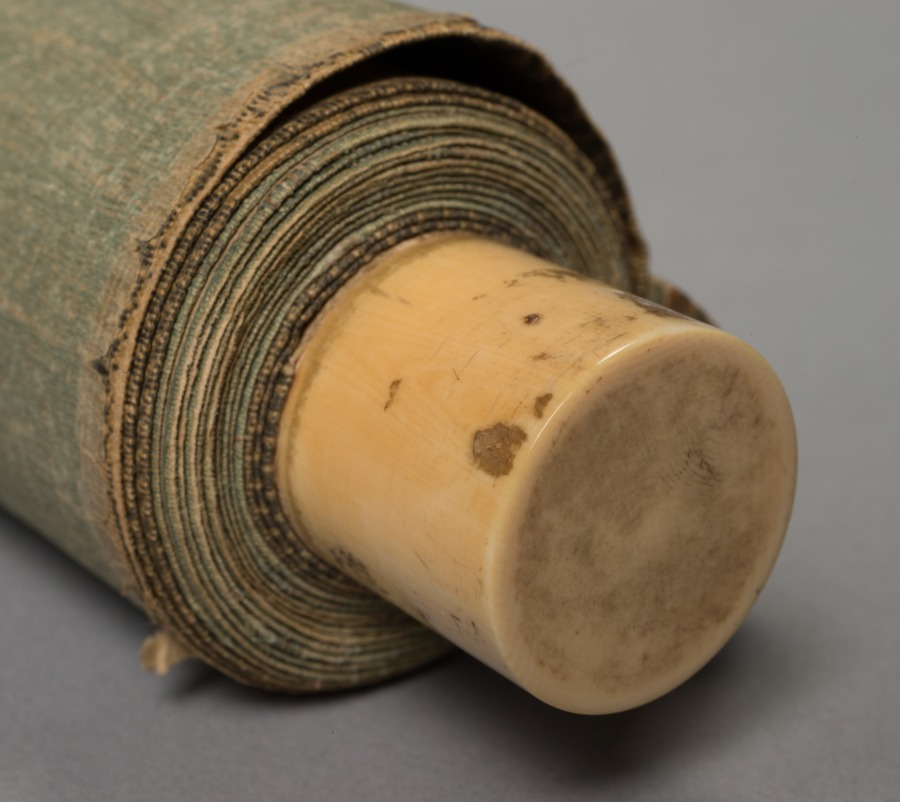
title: Bamboo in Wind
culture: Japan, Muromachi period (1392–1573)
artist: attributed to Genga (Japanese)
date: early 1500s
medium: hanging scroll; ink on silk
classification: Painting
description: East Asian paintings from China, Korea, and Japan were frequently conceived as sets of multiple images. These sets might have been composed for specific palace or temple rooms, or to portray a specific theme, such as the four seasons. Over time, the original intent of such sets is often lost through damage, changes in ownership, or a variety of other reasons. The identity of the artist can also be lost, but then, sometimes, retrieved. This pair of ink paintings has traditionally been labeled as Japanese and attributed to the 16th-century painter Genga. Since there are no seals or signature of the artist on the painting, this attribution was based on comparisons of brush style with paintings known to be by Genga. More recent study indicates that while the 16th century is an appropriate time frame for the pair, the precise cultural identity of the artist is not certain after all. The dark, eccentric shapes of the rocks and bamboo clusters and the dramatic tonal contrasts evident throughout the composition point to either Korean authorship or influence upon a Japanese painter of the period.